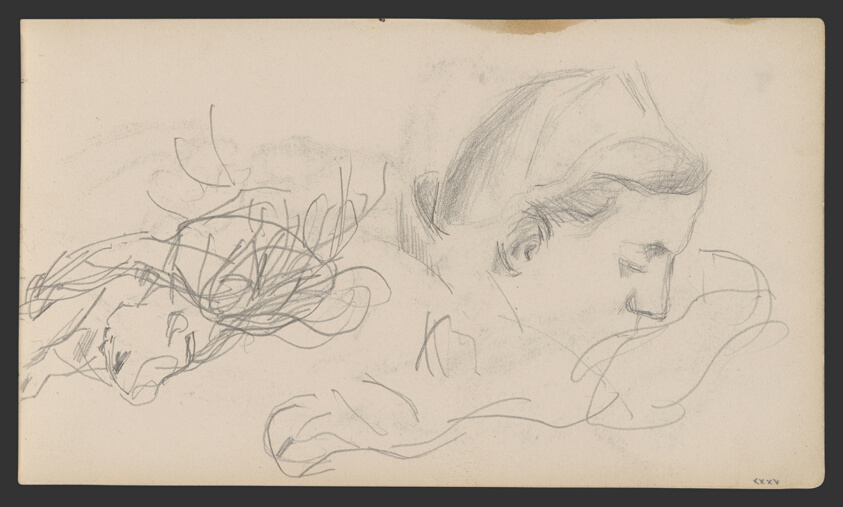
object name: Drawing and Watercolor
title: Sketchbook No. 2 (L'Estaque)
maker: Paul Cézanne; French, 1839-1906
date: 1875–86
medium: Graphite and pen and ink drawings on paper, bound into a book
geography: France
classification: sketchbook; graphite; prints and drawing; paper